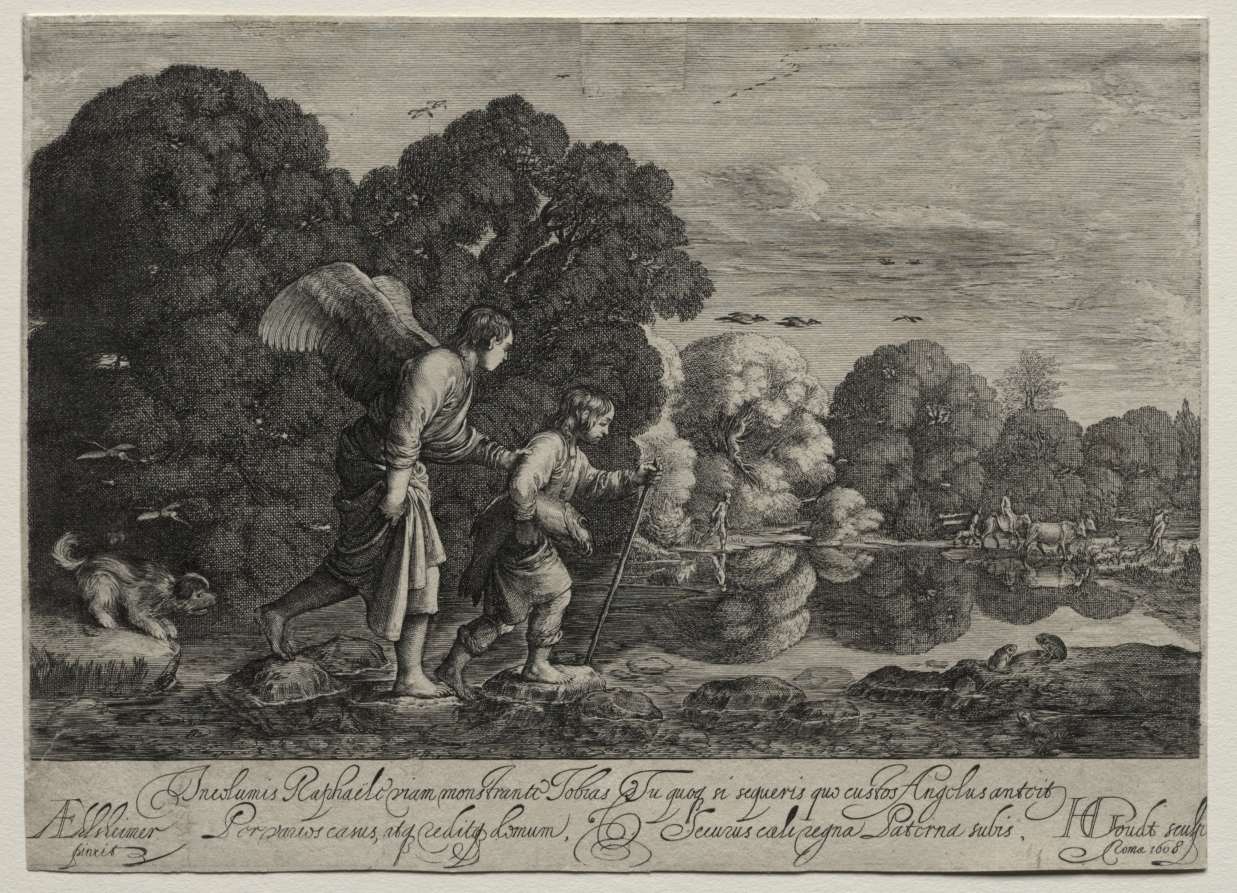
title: Tobias and the Angel (small plate)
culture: Netherlands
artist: Hendrik Goudt (Dutch, 1583–1648)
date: 1608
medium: engraving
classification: Print